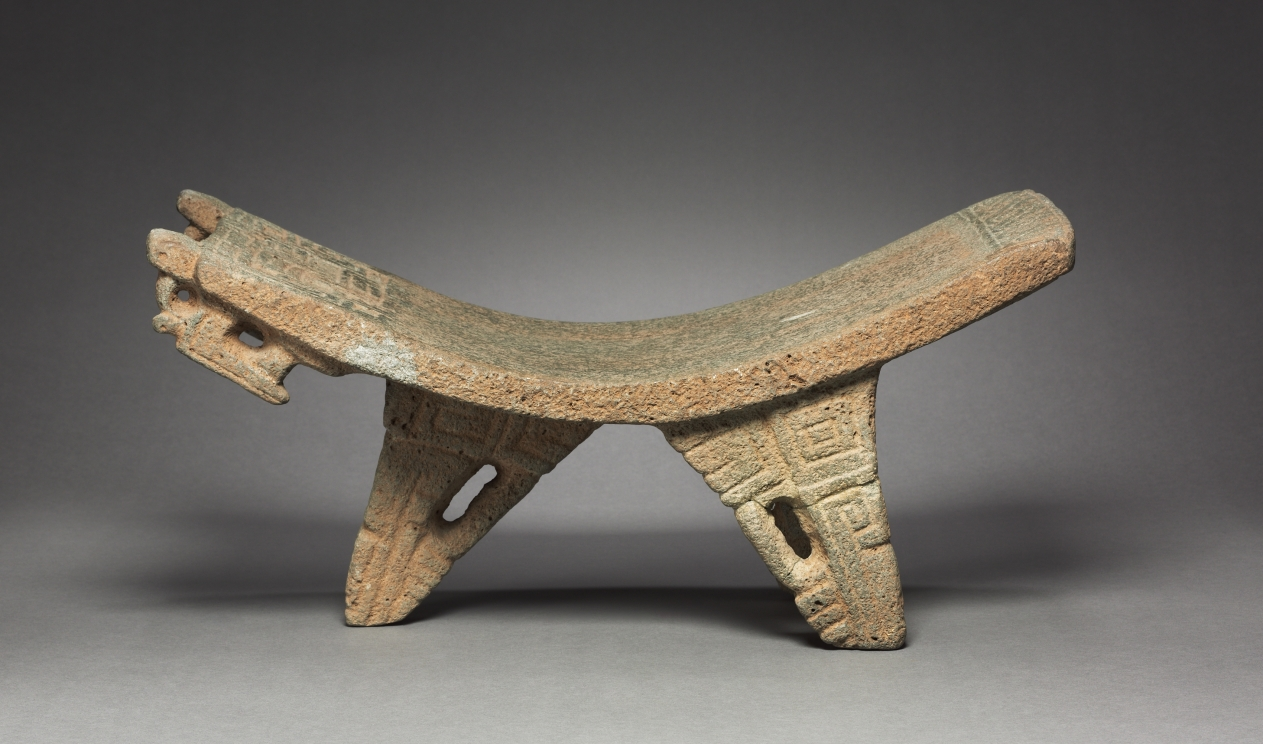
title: Metate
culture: Costa Rica, Guanacaste, northwest coast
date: 1200–1500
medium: gray volcanic stone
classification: Sculpture